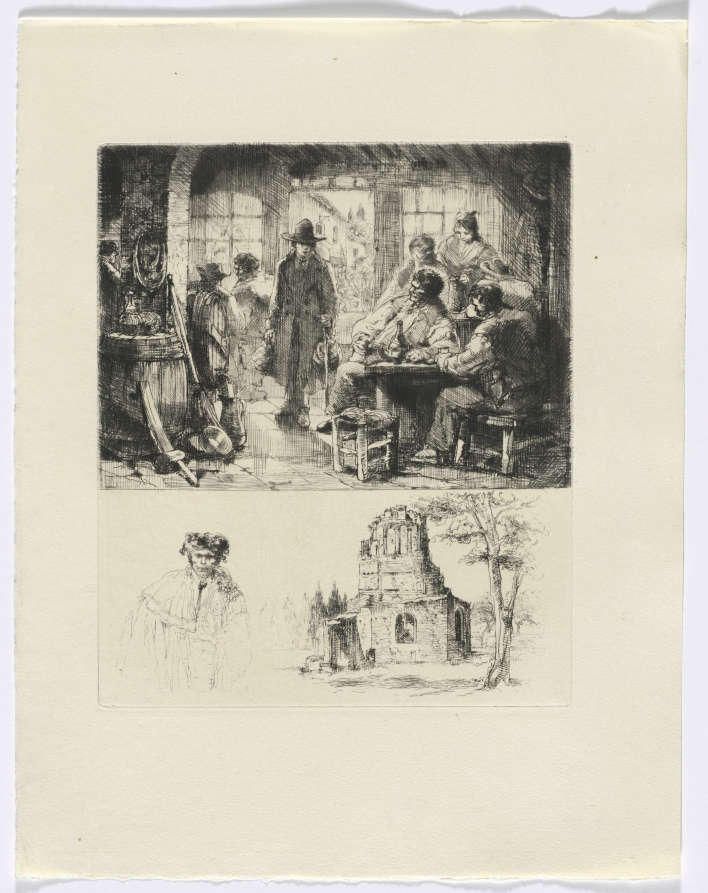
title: Frédéric Mistral: Mémoires et Recits by Frédéric Mistral: tavern scene/ ruin and man (insert after p. 96)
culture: France, 20th century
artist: Auguste Brouet (French, 1872–1941)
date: 1937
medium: etchings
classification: Portfolio